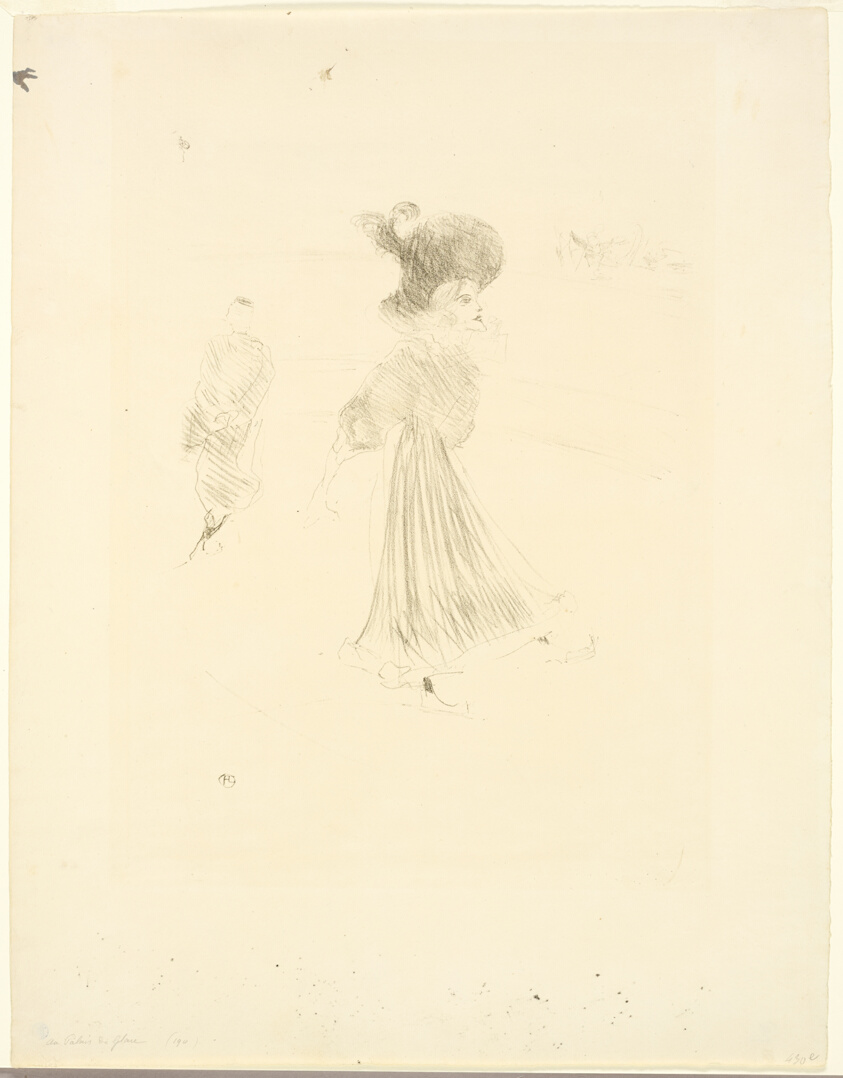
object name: Print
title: At the Ice Palace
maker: Henri de Toulouse-Lautrec (French, 1864-1901)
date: 1895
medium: Color lithograph on cream wove paper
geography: France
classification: lithograph; print; prints and drawing